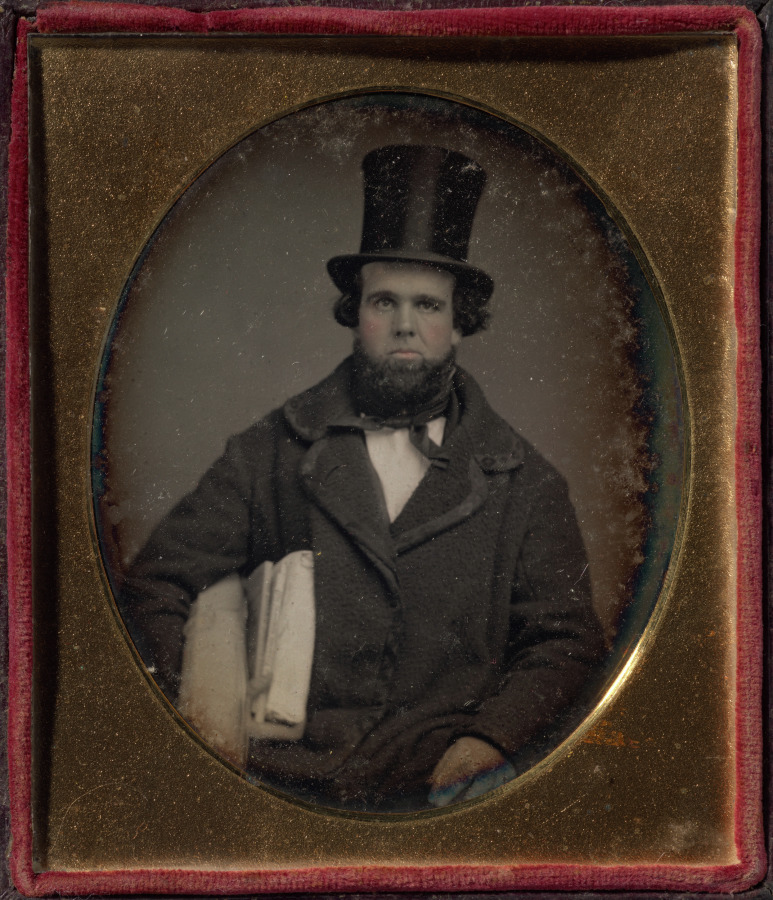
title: Architect with his drawings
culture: America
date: c. 1850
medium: daguerreotype, sixth plate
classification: Photograph